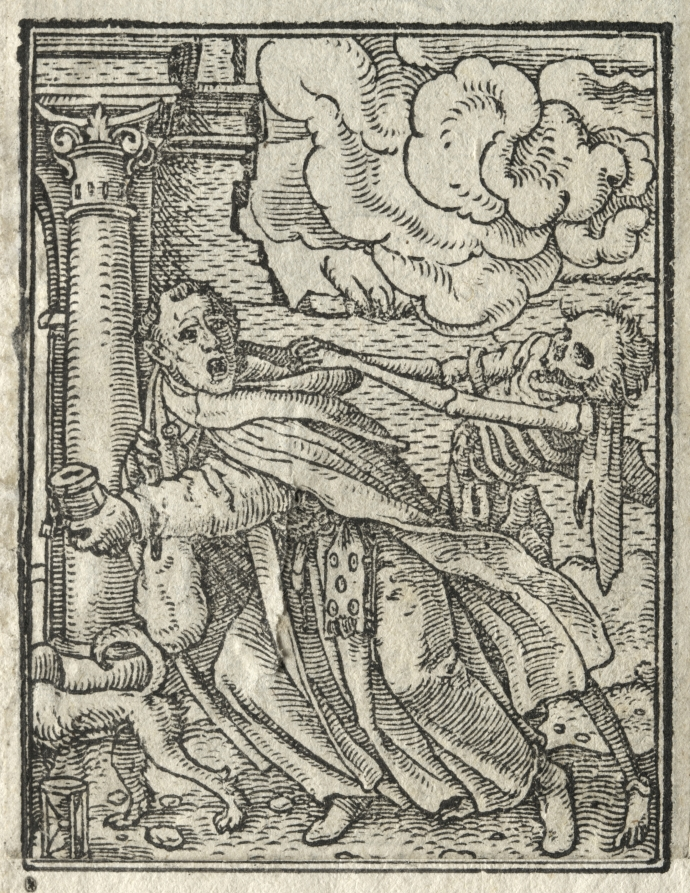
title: The Dance of Death: The Mendicant Friar; The Nun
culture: Germany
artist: Hans Holbein the Younger (German, active England and Switzerland, 1497/98–1543)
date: c. 1526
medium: woodcut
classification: Print